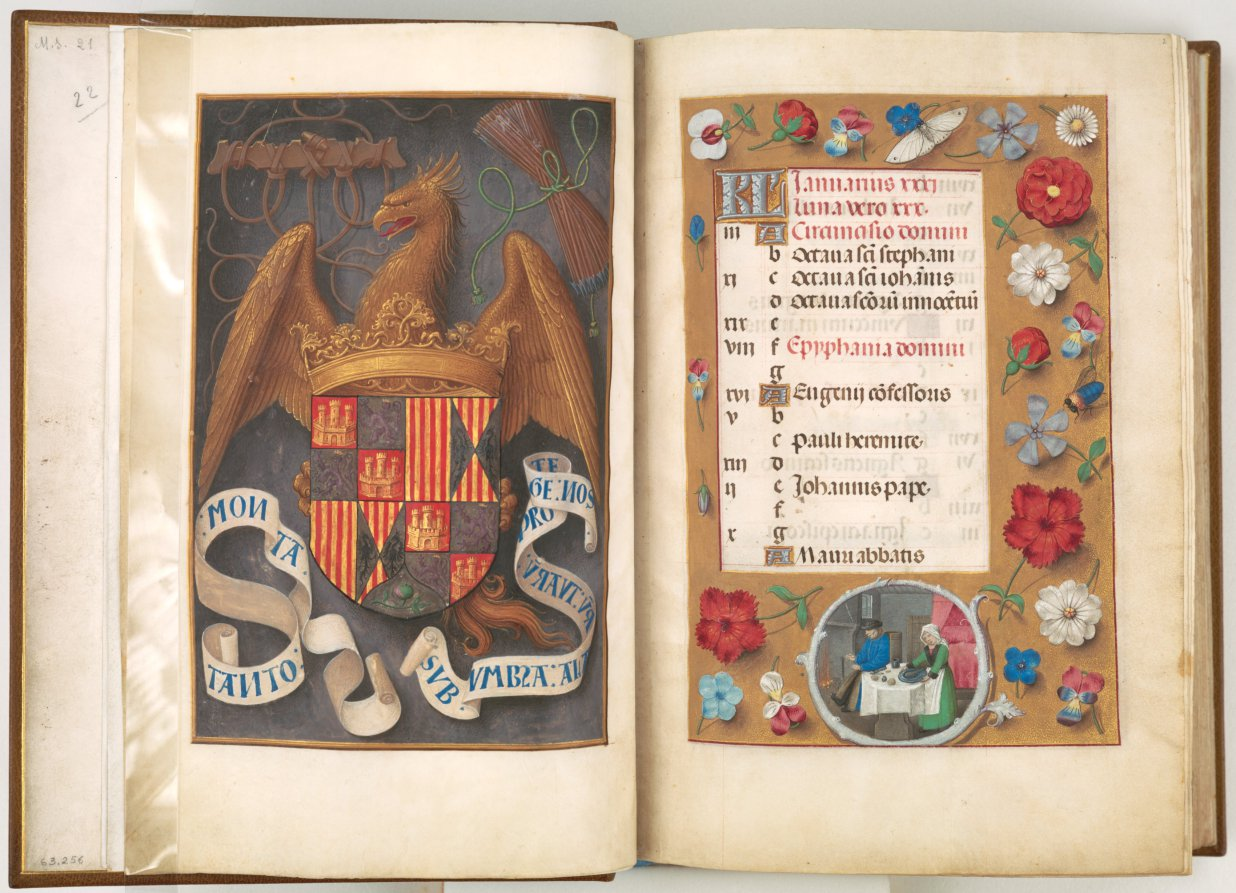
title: Hours of Queen Isabella the Catholic, Queen of Spain: Fol. 1v, Arms and Mottoes of Isabel la Católica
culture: Flanders, Ghent and Bruges, late 15th century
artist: Master of the First Prayerbook of Maximillian (Flemish, c. 1444–1519)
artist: and Associates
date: c. 1500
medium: ink, tempera, and gold on vellum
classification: Bound Volume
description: This manuscript was illuminated by a circle of at least five highly organized manuscript painters active in the Flemish cities of Ghent and Bruges. The principal illuminator was Alexander Bening, who painted the majority of the book's miniatures. Manuscripts produced by this circle of artists are renowned for the decoration of their borders, which typically feature a rich variety of realistically painted flowers, birds, and butterflies. This prayer book, called a book of hours, was intended not for a cleric but for the private devotions of a lay person—in this case, Isabella the Catholic, Queen of Spain (1451–1504); her coat of arms embellishes the book's frontispiece. It is unlikely that the book was commissioned by the Queen herself; rather, she probably received it as a diplomatic gift from someone courting her patronage, perhaps Cardinal Francisco Jimenez de Cisneros. A Franciscan friar, Jimenez was dependent upon Isabella for his advancement, first to the post of Queen's confessor in 1492, and then to Archbishop of Toledo in 1495.